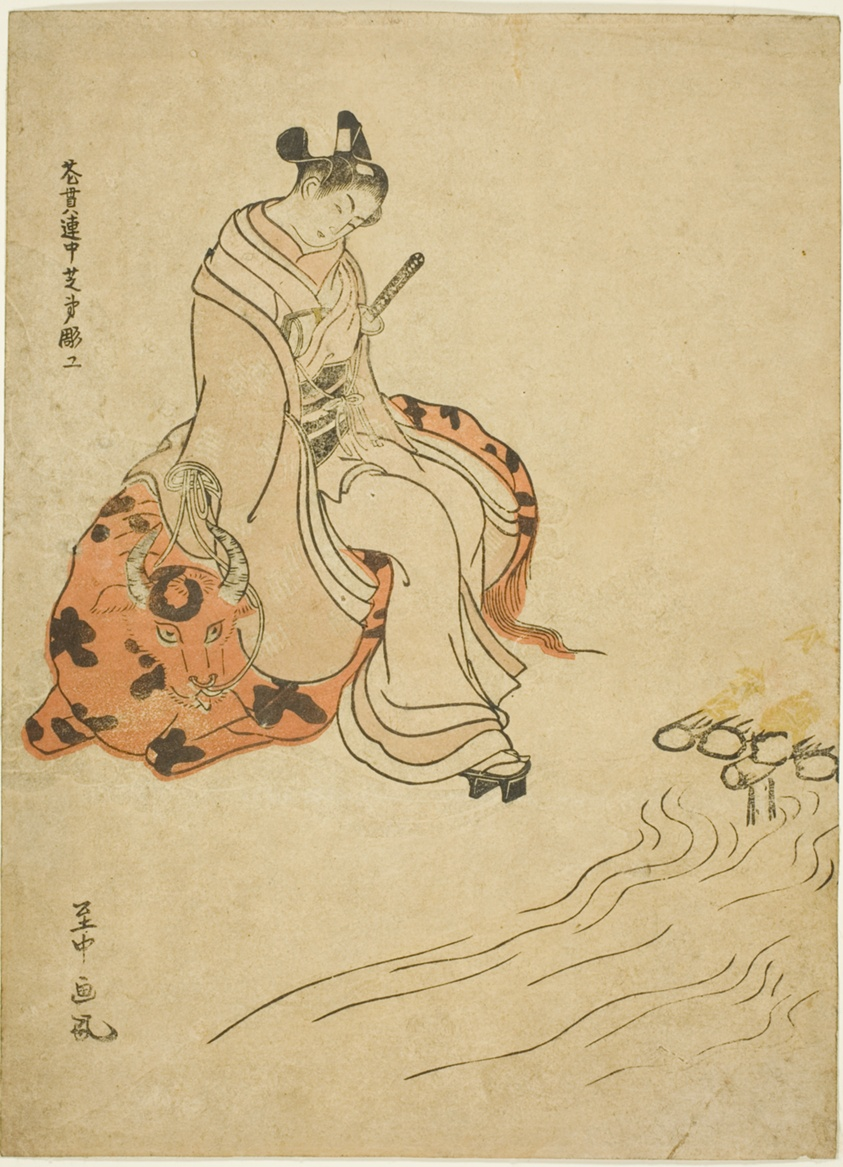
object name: Print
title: Young Man Seated on an Ox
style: Japanese (culture or style)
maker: Shichu; Japanese, 18th century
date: 1765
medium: Color woodblock print; chuban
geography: Japan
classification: woodblock print; print; asian art